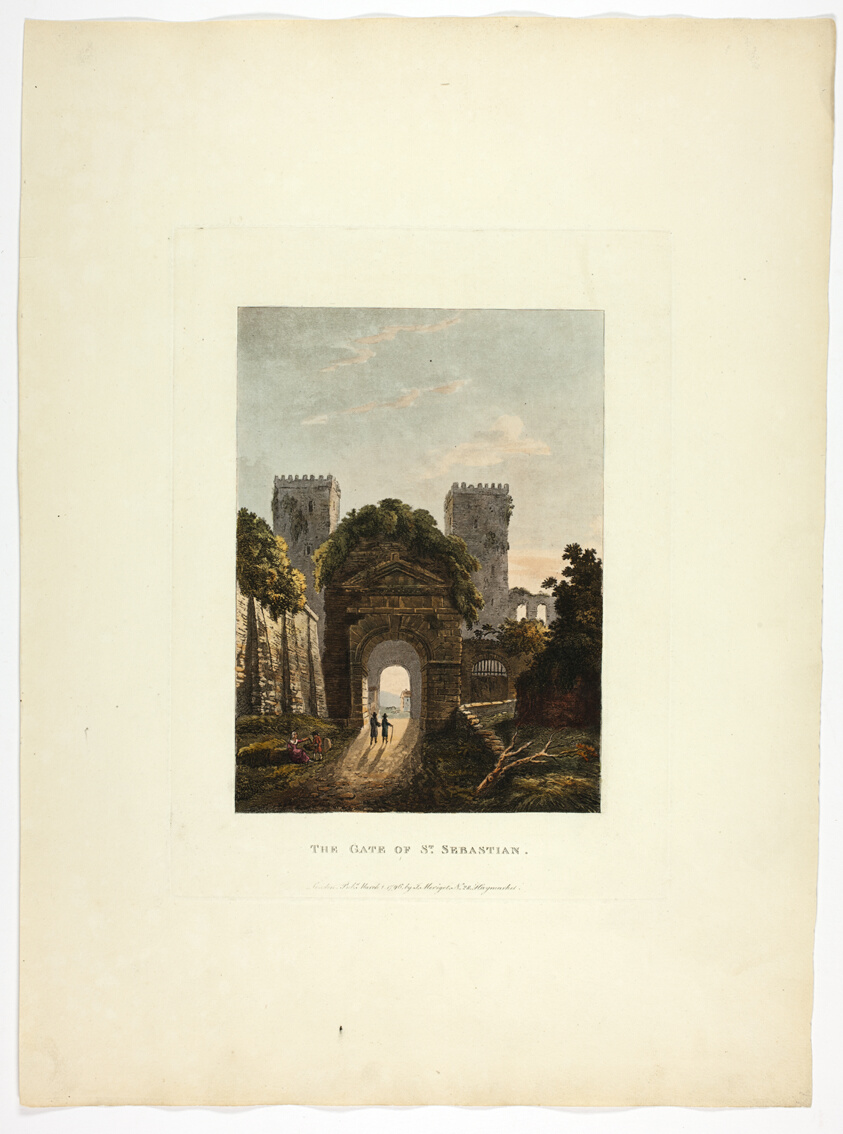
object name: Print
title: The Gate of St. Sebastian, plate seventeen from the Ruins of Rome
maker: M. Dubourg, (English, active 1786-1838); published by J. Merigot (Italian, Unknown)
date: published March 1, 1796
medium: Hand-colored aquatint on paper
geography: England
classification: aquatint; print; prints and drawing